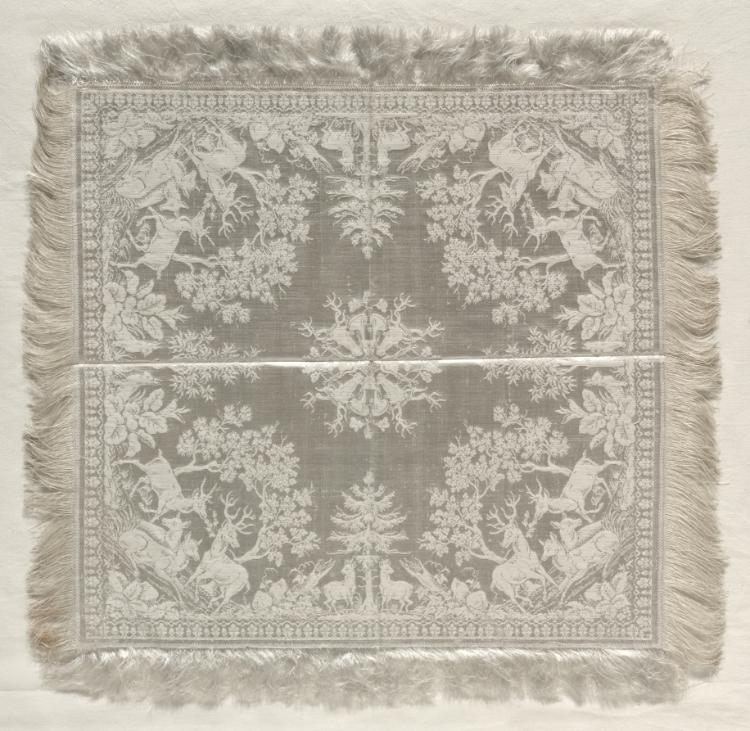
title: Napkin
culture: Germany, Dresden, 19th century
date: 1867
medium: damask: linen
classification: Textile